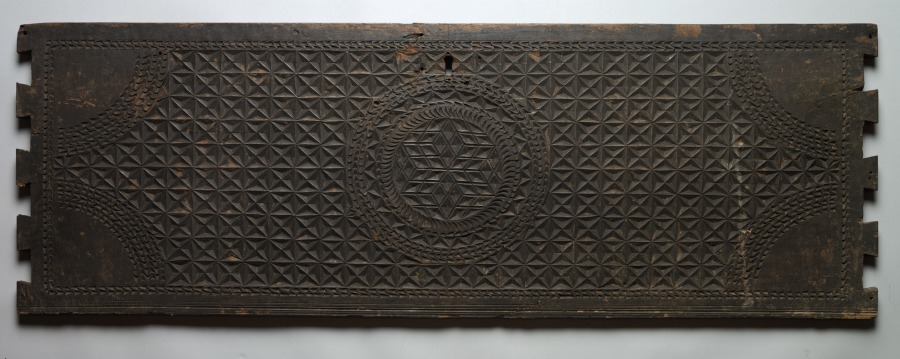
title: Chest Front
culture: India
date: 1700s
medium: wood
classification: Wood